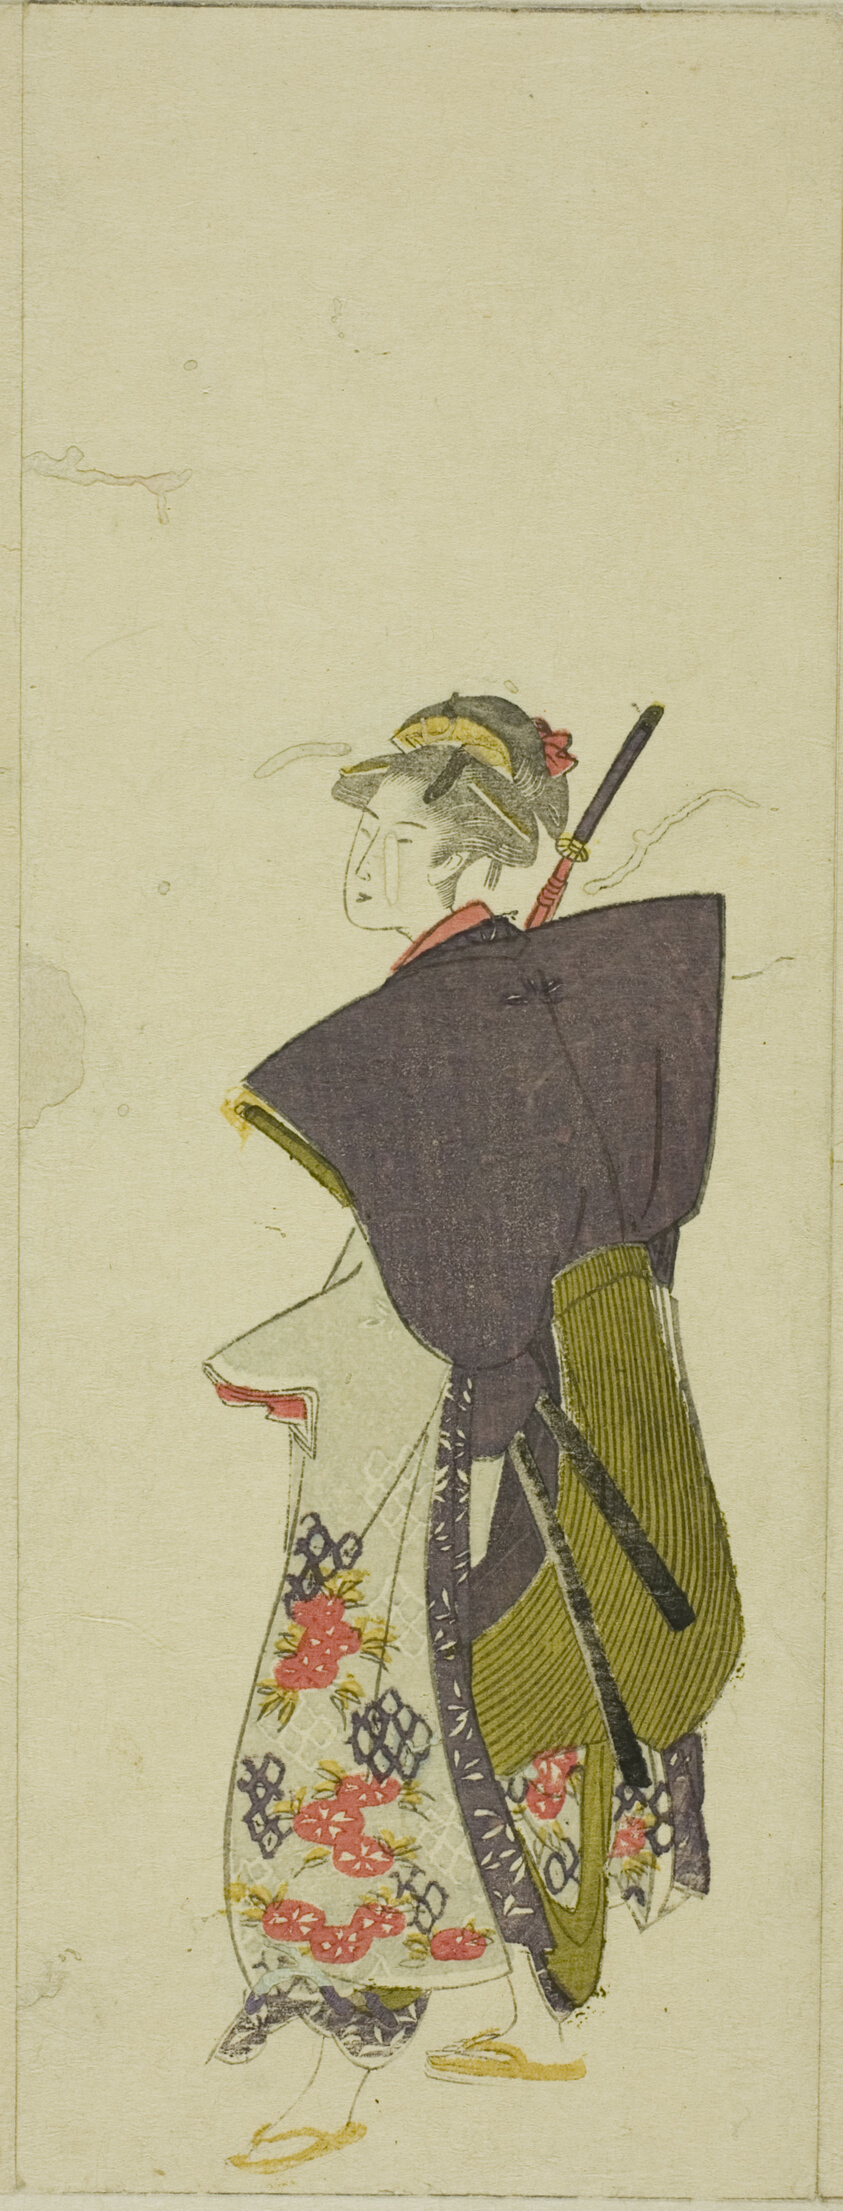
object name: Print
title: Parody of a daimyo procession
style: Japanese (culture or style)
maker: Utagawa Toyohiro (Japanese, 1773-1828)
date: c. 1805/07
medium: Color woodblock print; 1 of 12 sheets (see 1928.391-402)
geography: Japan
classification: woodblock print; print